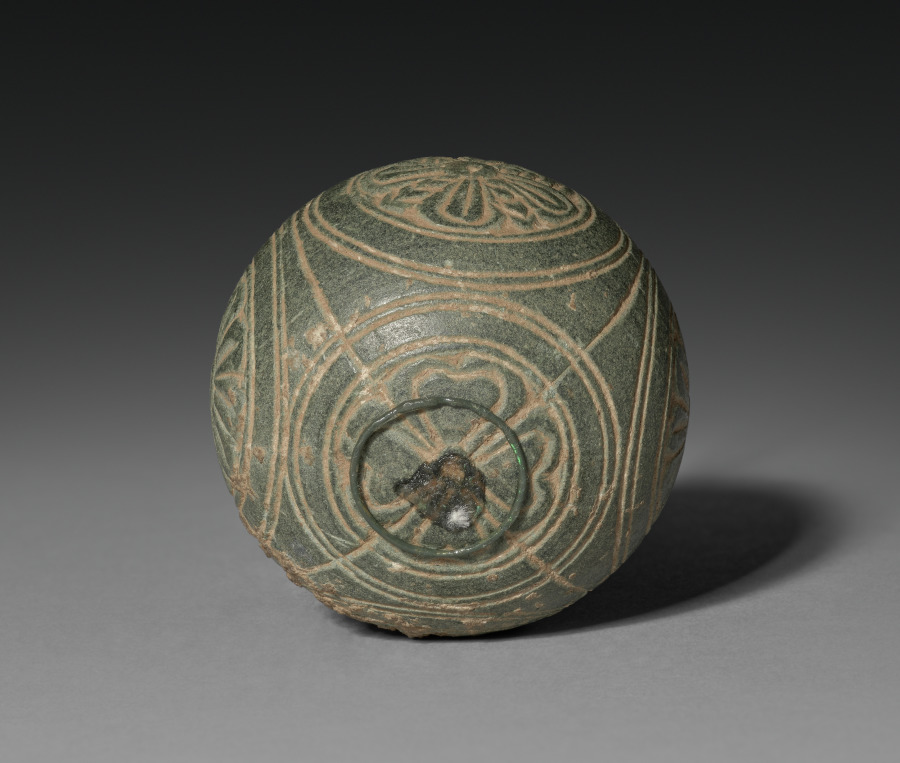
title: Miniature Stone Reliquary or Toilette Casket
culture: Pakistan, Gandhara, probably Sirkap, early Kushan period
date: 1–100 CE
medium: gray schist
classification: Sculpture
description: Tiny reliquaries holding the cremated remains of the Buddha or a high-ranking holy person empowered monuments and made them sacred. A Buddhist monument, such as the solid hemispherical mounds called stupas, would not be worshipped until it was consecrated with the relic secreted inside. Bits of ash were combined with tiny gems inside a crystal or glass reliquary, which was then placed inside a stone or metal container, like the lidded versions seen here. These containers look like cosmetic vessels for aromatic pastes used for perfume in ancient India. Buddhist texts state that the enlightened Buddha emitted a fragrance like sandalwood paste; the form of the reliquary as a perfume bottle indicates the presence of the Buddha by the visual reference to his pleasant scent. Once enclosed in the stupa the reliquaries would not be seen, but monks were tasked with applying sandalwood paste to the exterior of stupas as part of their regular maintenance to convey to visitors the ongoing presence of the Buddha radiating from the relic in the center.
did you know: The knob of the lid is gilded, as is the interior of the casket.